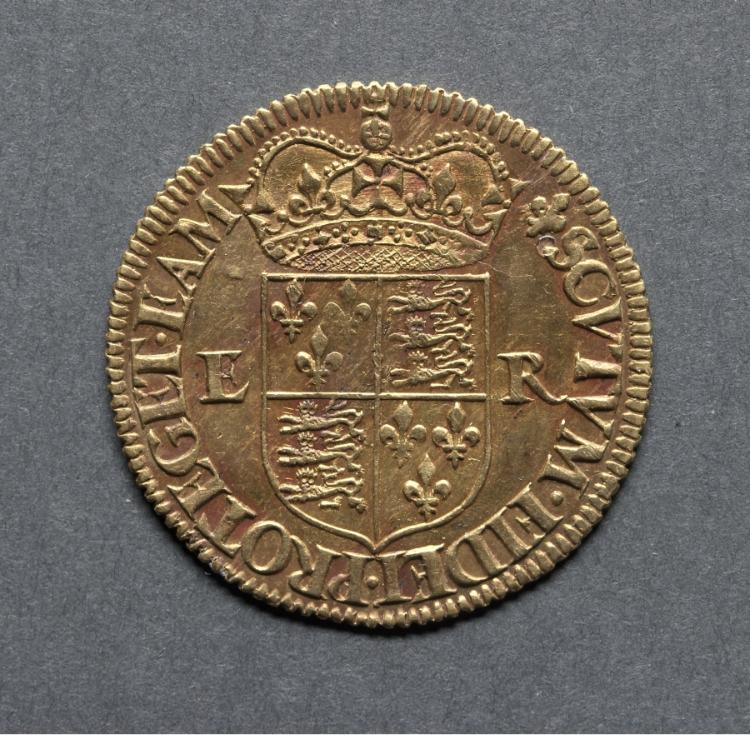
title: Half Pound: Crowned Shield of Arms (reverse)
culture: England, Elizabeth I, 1558-1603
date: 1558–1560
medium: gold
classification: Coins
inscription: SCVTVM • FIDEI • PROTEGET • EAM